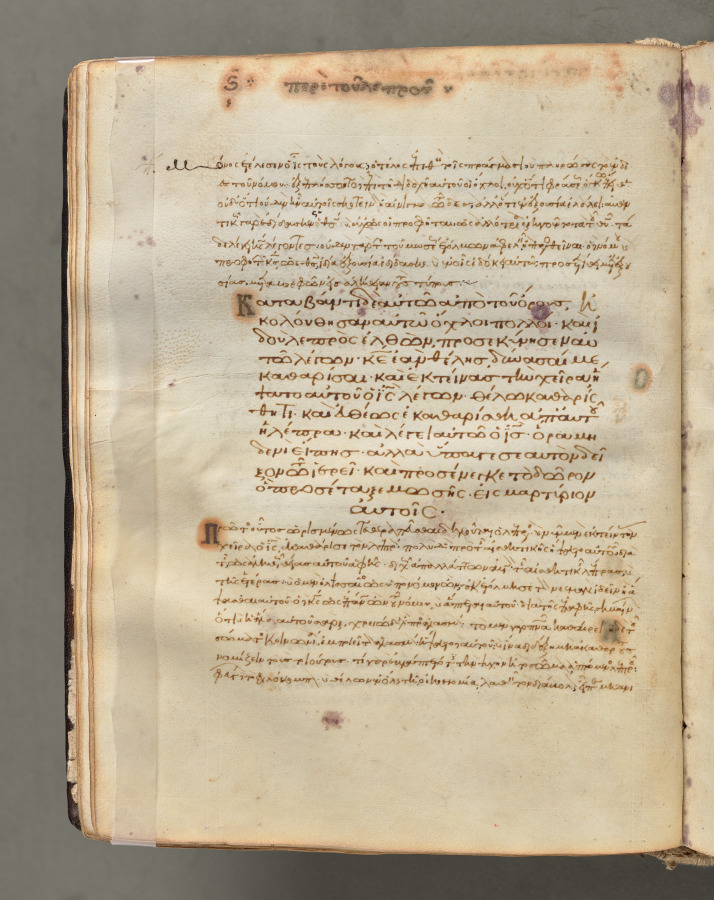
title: Text, folio 32 (verso), from a Gospel Book with Commentaries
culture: Byzantium, Constantinople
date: c. 1000–1100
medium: ink, tempera, and gold on vellum; leather binding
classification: Bound Volume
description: Each of the four gospels in this book opens on a page with brilliantly illuminated borders depicting the author of the text as well as birds-principally peacocks, symbols of the immortality of the soul-and fountains, representing the fountain of life and the salvation of the soul. This volume consists of 428 leaves with texts in Greek. Its level of sophistication suggests that it was probably written and decorated in a monastery in Constantinople.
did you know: Gospel Books were carried in procession through Byzantine churches.